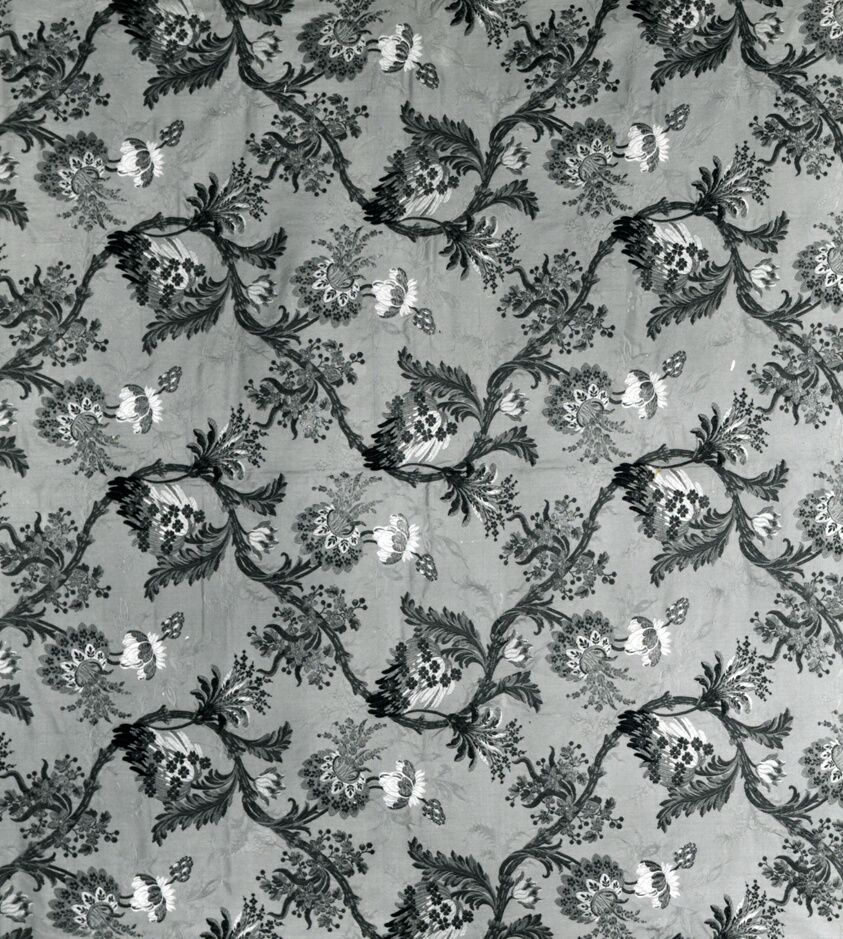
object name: Textile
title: Panel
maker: France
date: c. 1870/80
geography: France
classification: textile; weaving